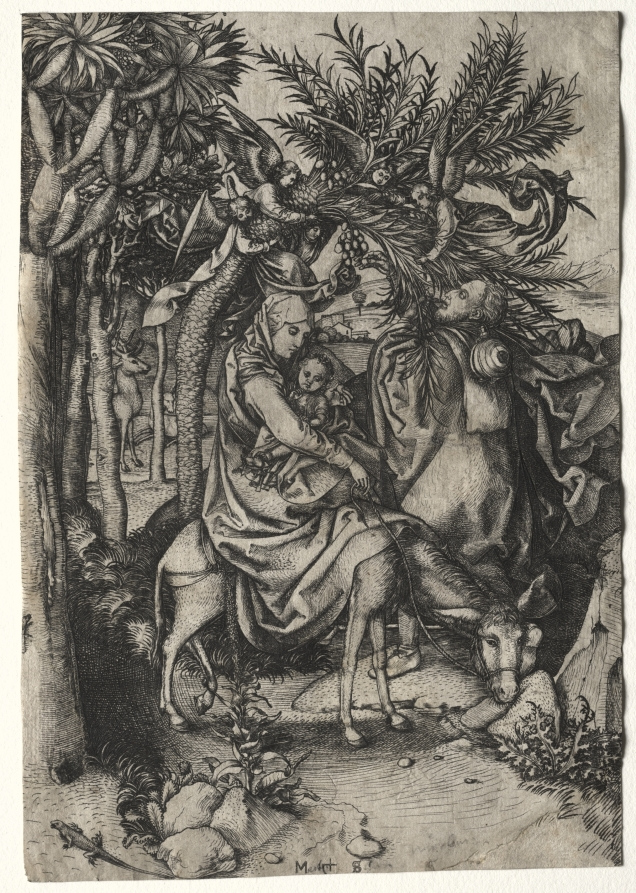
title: Life of the Virgin: The Flight into Egypt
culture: Germany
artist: Martin Schongauer (German, c. 1450–1491)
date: 1470–75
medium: engraving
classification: Print